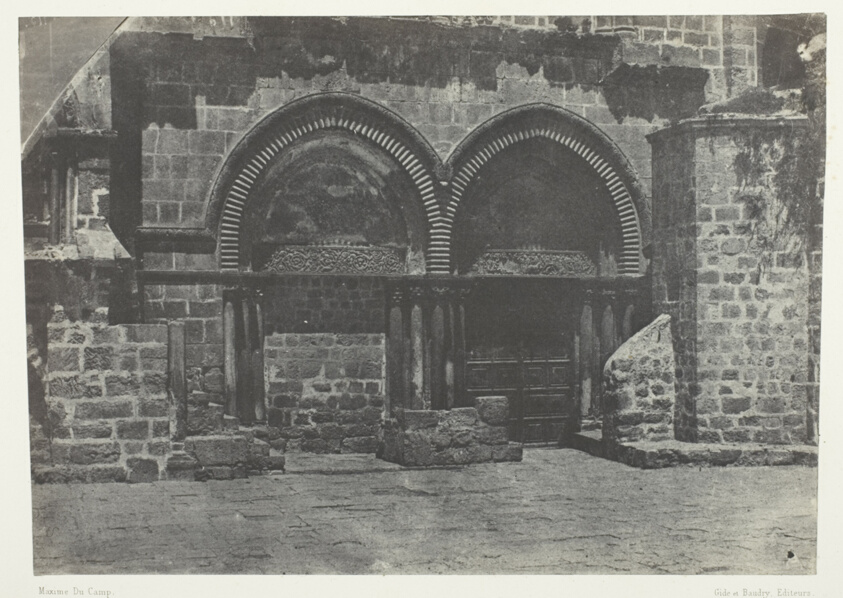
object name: Photograph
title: Jérusalem, Arcades Inférieures De L'Eglise Du Saint-Sépulcre; Palestine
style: 19th century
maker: Maxime Du Camp (French, 1822–1894); printed by the Imprimerie Photographique de Blanquart-Evrard (French, founded 1851)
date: 1849/51, printed 1852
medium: Salted paper print, plate 115 from the album "Egypte, Nubie, Palestine et Syrie" (1852)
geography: France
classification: salted paper print; photographic process; photography; photograph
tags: Collected by Hugh Edwards, Egypte, Nubie, Palestine et Syrie